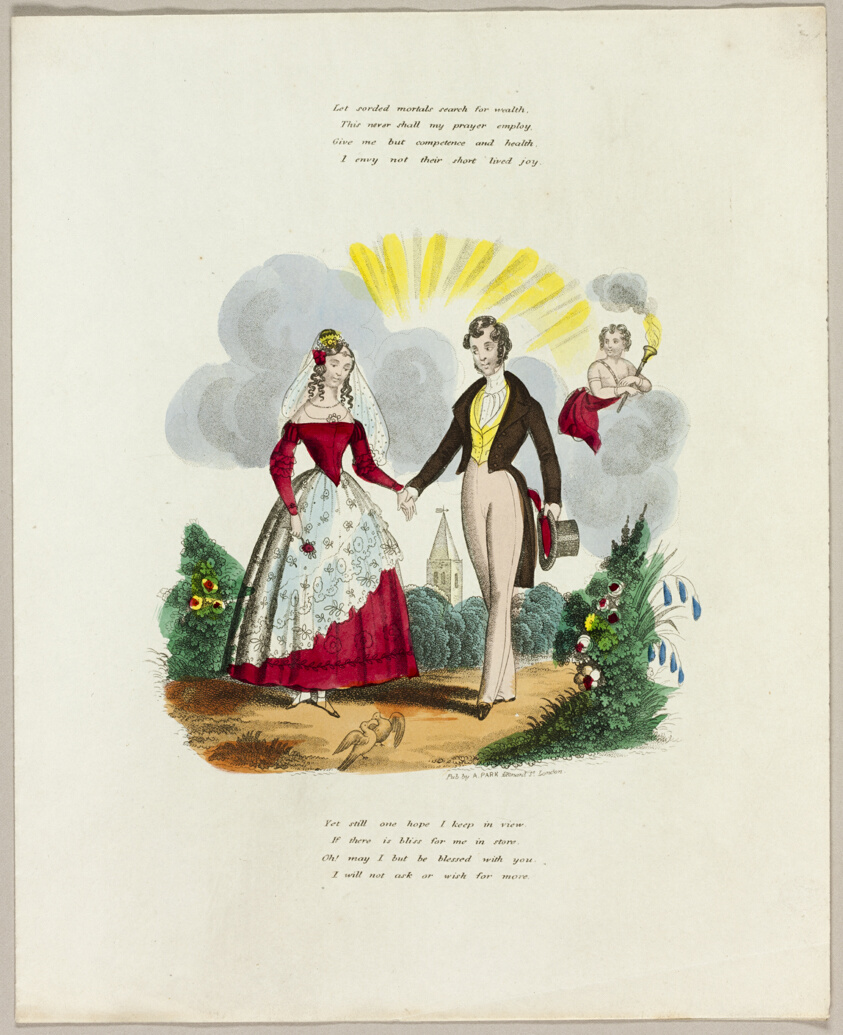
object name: Print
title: Let Sordid Mortals Search for Wealth (valentine)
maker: Unknown Artist (English, 19th century); published by A. Park (English, 19th century)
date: c. 1842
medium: Lithograph with hand-coloring on ivory wove paper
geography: England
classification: valentine; prints and drawing; print